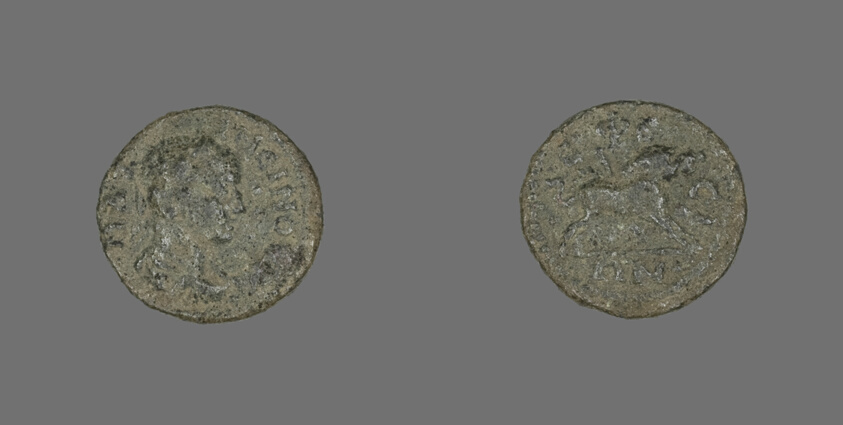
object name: Coin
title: Coin Depicting Emperor Maximinus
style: roman (ancient, style or period), ancient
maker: Roman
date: 235-238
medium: Bronze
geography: Rome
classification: coin; ancient art